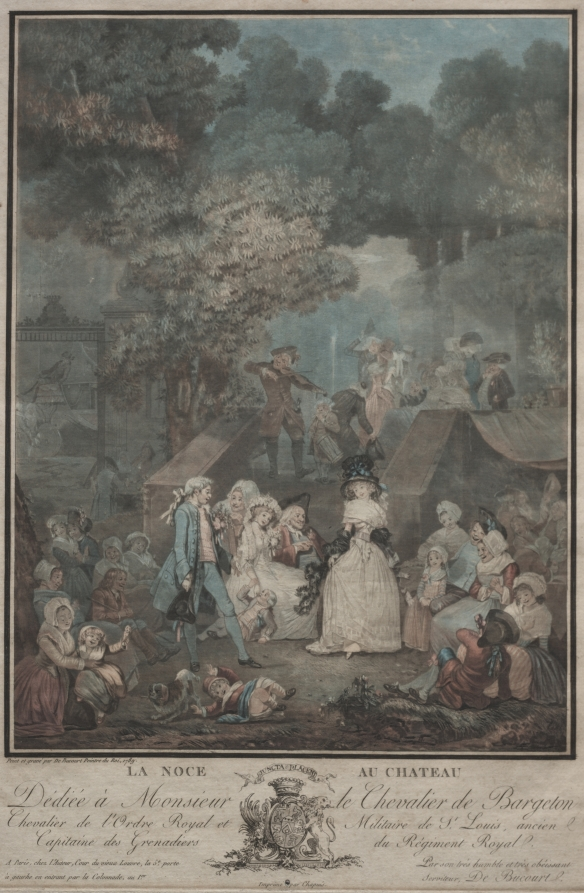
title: La Noce au Château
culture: France, 18th century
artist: Philibert Louis Debucourt (French, 1755–1832)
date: 1789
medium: engraving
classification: Print